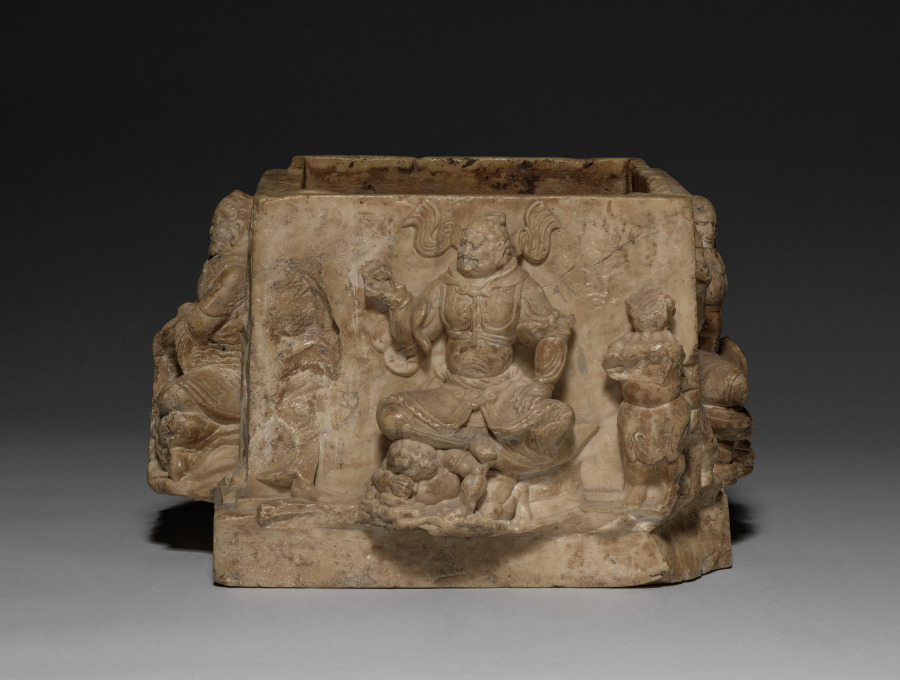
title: Square Urn with Celestial Guardians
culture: China, Tang dynasty (618–907)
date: 700s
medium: marble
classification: Sculpture